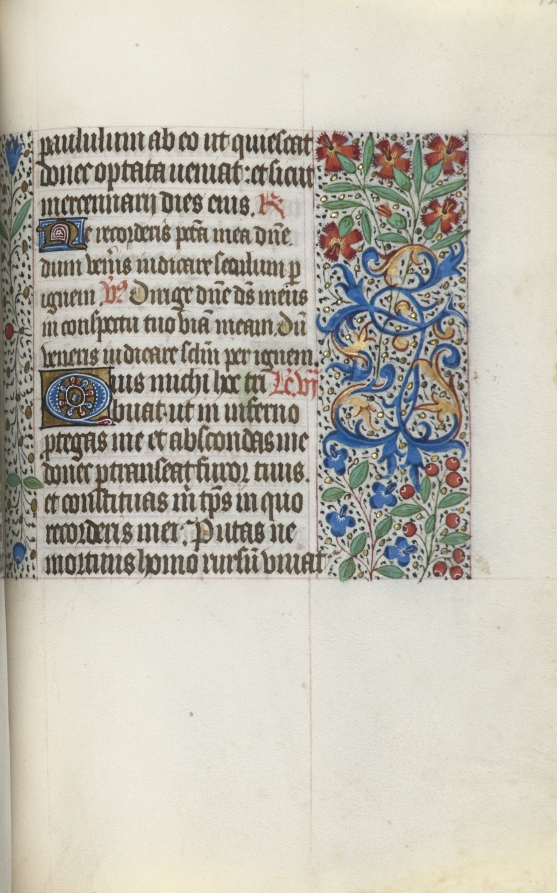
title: Book of Hours (Use of Rouen): fol. 124r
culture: France, Rouen, 15th century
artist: Master of the Geneva Latini (French, active Rouen, 1460–80)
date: c. 1470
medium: ink, tempera, and gold on vellum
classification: Bound Volume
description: In the late 1400s and early 1500s Rouen was an established and important center of book production. The city’s cathedral had a wealthy chapter that spent large sums of money to commission books and to maintain its extensive library. The stationers and booksellers would have likely been concentrated in or near the cathedral precinct. This artist, named after a manuscript now in Geneva, was Rouen’s principal illuminator during the second half of the 1400s.